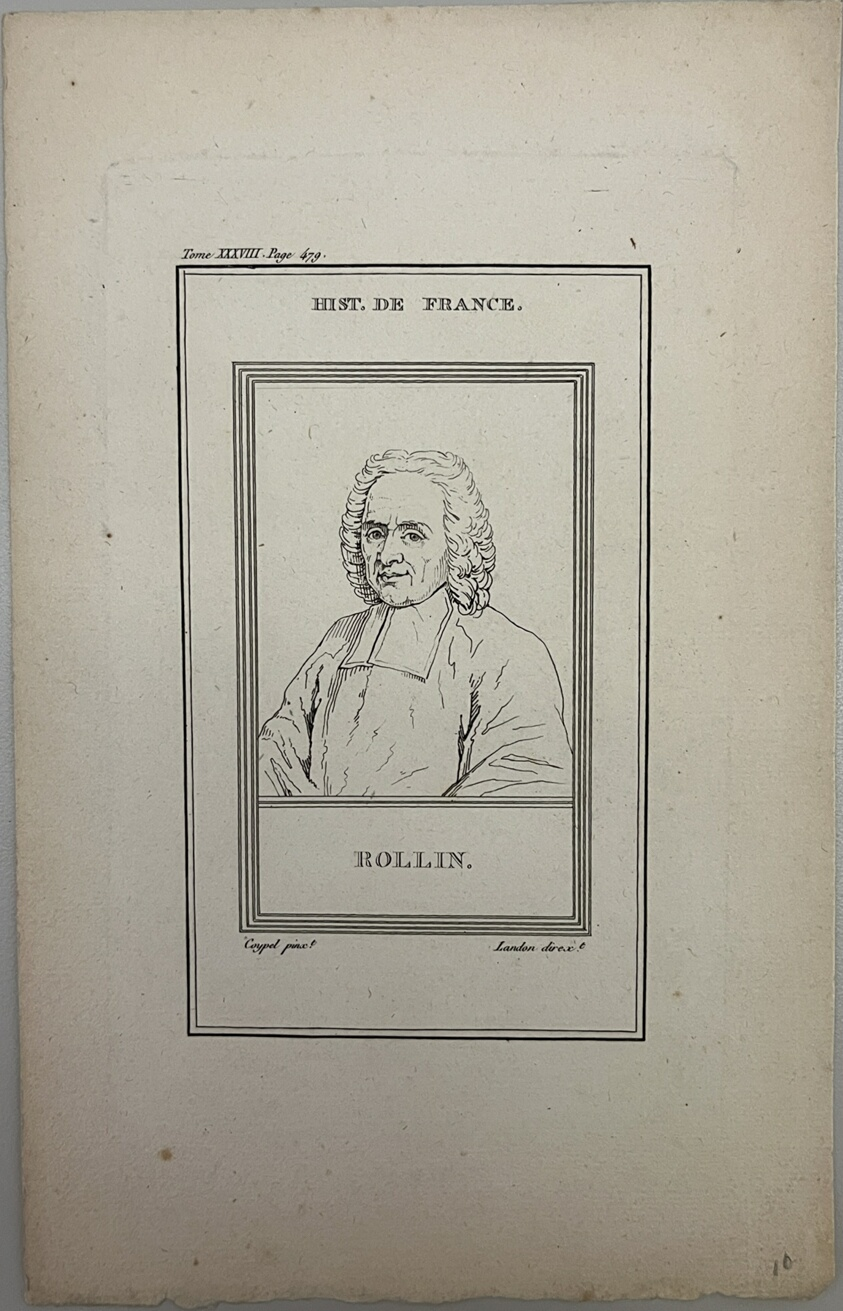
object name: Print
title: Rollin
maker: Landon (likely American or British, 19th century); after Charles Antoine Coypel (French, 1694-1752)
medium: Etching on paper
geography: United States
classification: reproduction; print; prints and drawing